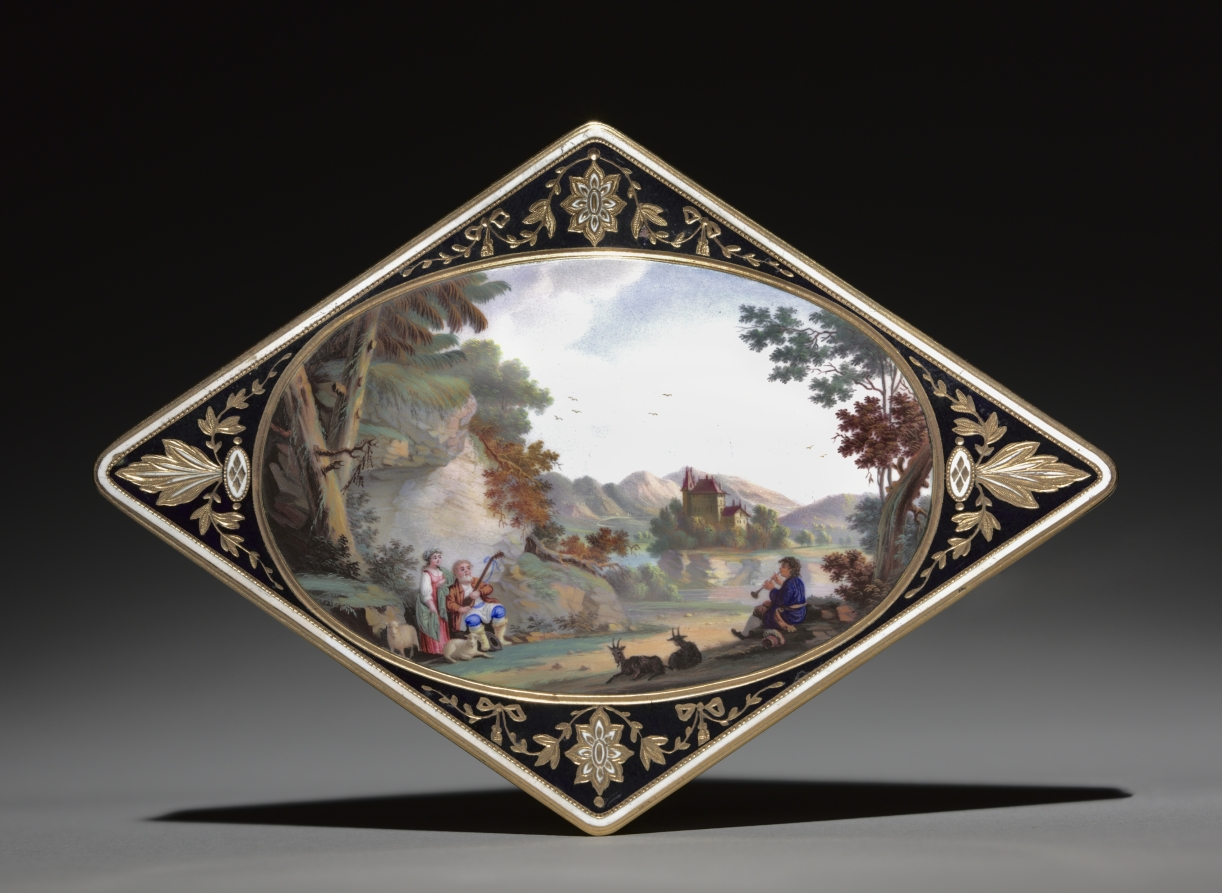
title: Box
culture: Switzerland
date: early 1800s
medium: gold and enamel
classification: Enamel